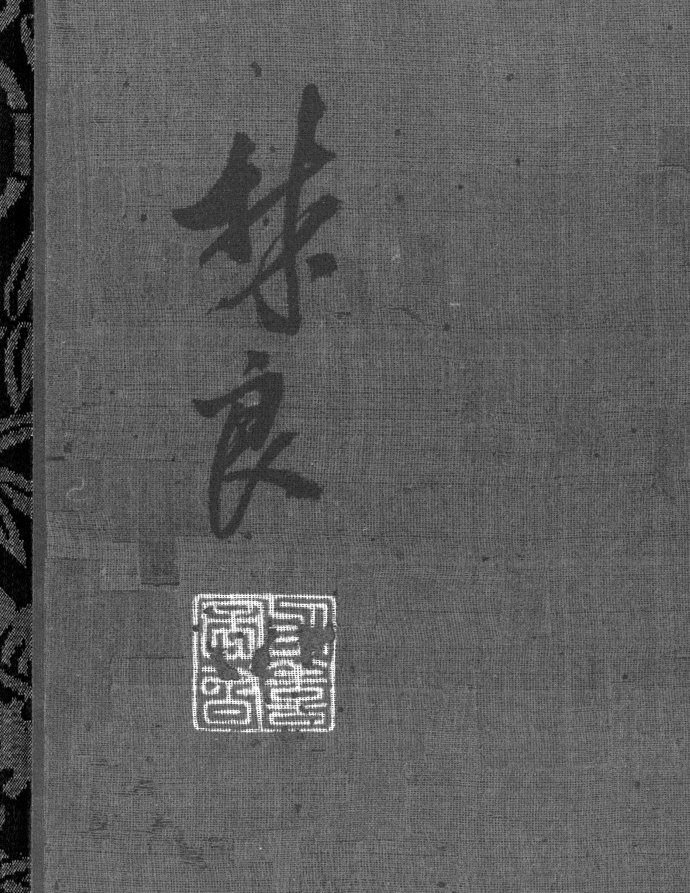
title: A Pair of Peafowl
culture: China, Ming dynasty (1368–1644)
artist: Lin Liang (Chinese, 1416–1480)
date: late 1400s-early 1500s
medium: hanging scroll, ink on silk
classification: Painting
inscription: 林良. [印] 以善圖書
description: The peacock, identified by the flamboyant tail, is paired with a female peahen to its right. In lowering her head, the hen seems to show respect to the male peacock. With his articulate brushstrokes and strong contrasting tones, Lin Liang’s representation in black ink appears as vivid as Yin Hong’s colorful peacock (1974.31). The painter skillfully uses wet and dry ink as well as broad and thin washes to represent the plumage of the bird. The surface of the rocks, depicted in powerful sweeping strokes, recalls the landscape painting style of the Zhe School, which specialized in expressive brushwork.